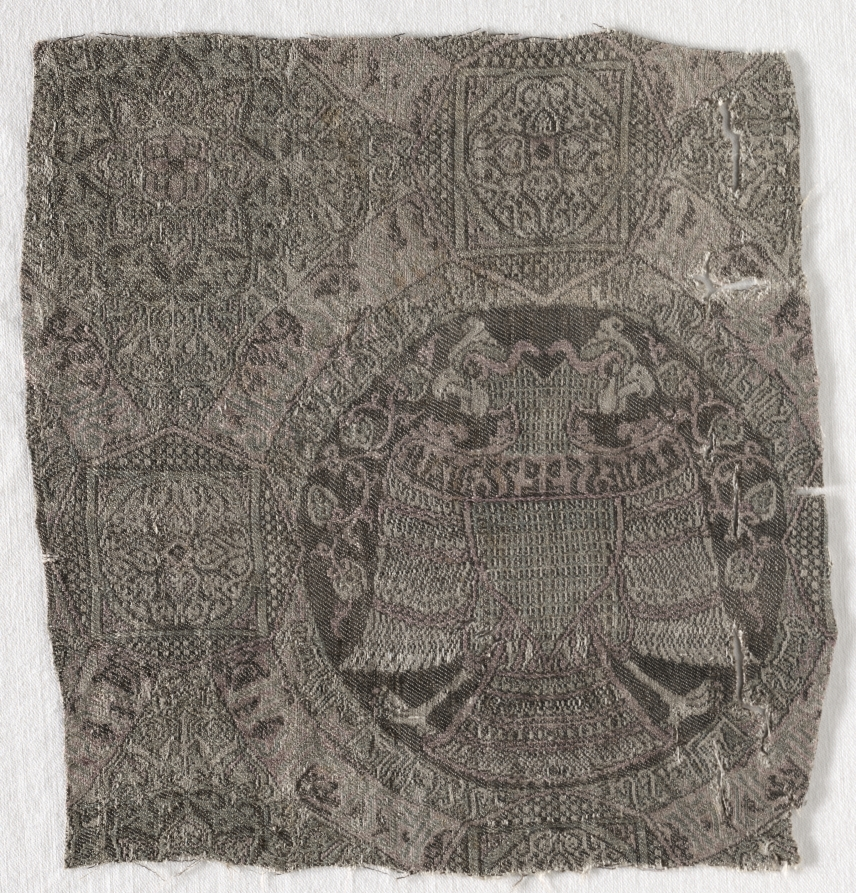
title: Fragment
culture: Iran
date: before 1973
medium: silk weave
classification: Textile